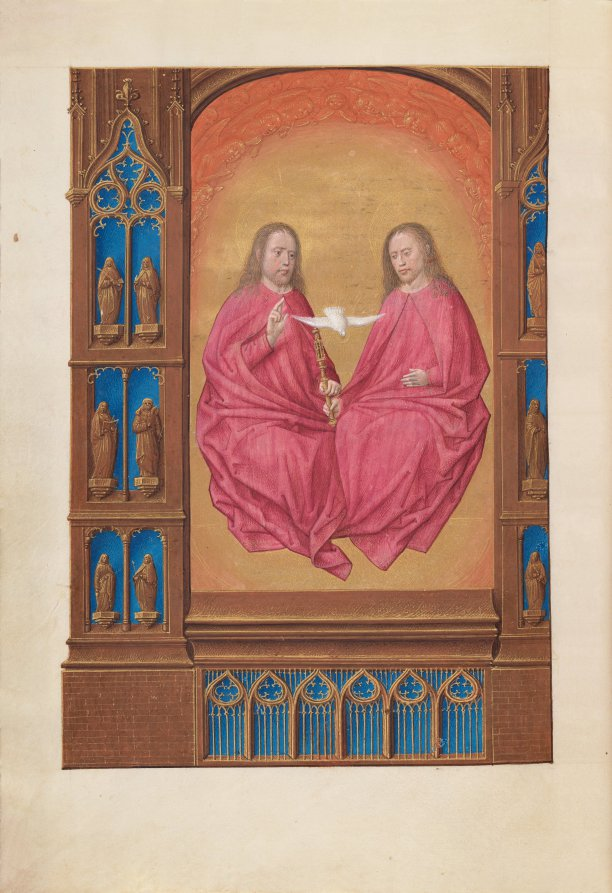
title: Hours of Queen Isabella the Catholic, Queen of Spain: Fol. 17v, The Trinity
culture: Flanders, Ghent and Bruges, late 15th century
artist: Master of the First Prayerbook of Maximillian (Flemish, c. 1444–1519)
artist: and Associates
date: c. 1500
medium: ink, tempera, and gold on vellum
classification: Bound Volume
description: This manuscript was illuminated by a circle of at least five highly organized manuscript painters active in the Flemish cities of Ghent and Bruges. The principal illuminator was Alexander Bening, who painted the majority of the book's miniatures. Manuscripts produced by this circle of artists are renowned for the decoration of their borders, which typically feature a rich variety of realistically-painted flowers, birds, and butterflies. This prayer book, called a book of hours, was intended not for a cleric, but for the private devotions of a lay person-in this case, Isabella the Catholic, Queen of Spain (1451-1504). Isabella's coat of arms embellishes the book's frontispiece. It is unlikely that the book was commissioned by the Queen herself; rather, she probably received it as a diplomatic gift from someone courting her patronage, perhaps Cardinal Francisco Jimenez de Cisneros. A Franciscan friar, Jimenez was dependent upon Isabella for his advancement, first to the post of Queen's confessor in 1492, and then to Archbishop of Toledo in 1495.